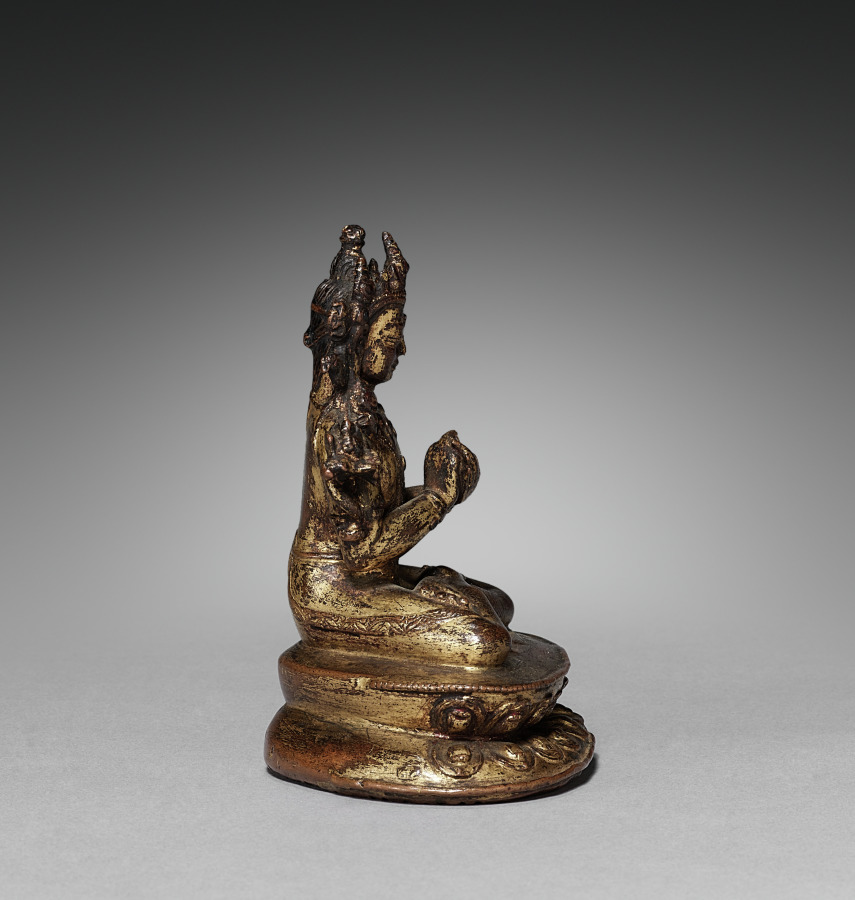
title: Manjuvara Turning the Wheel of the Law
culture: Nepal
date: 1300s–1400s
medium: gilded copper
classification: Sculpture